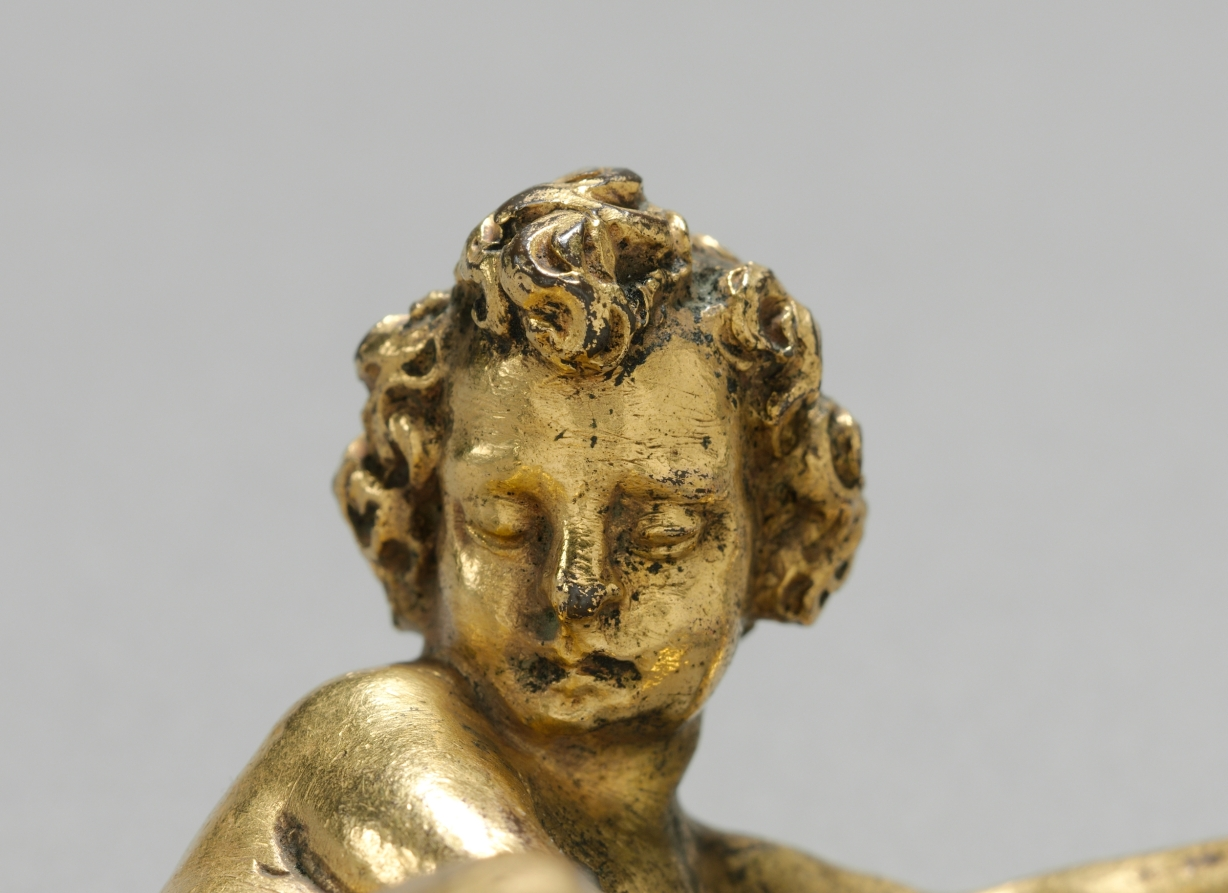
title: Putto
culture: Italy, Rome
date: late 1500s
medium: gilt bronze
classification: Sculpture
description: These gilt bronze putti, or figures of plump male children in the nude, are near mirror images of one another. Both are seated, with their arms flung to the side. Minimal detailing exists in the hands and feet, with the fingers and toes signified only by simple line indentations. The function and original placement of the putti is uncertain, but their posture and the placement of their hands suggest that originally they may have been placed in a larger statue group, perhaps holding either side of a banner, or even a piece of furniture. A will drawn up by Guglielmo della Porta in 1558 mentions the existence of bronze Passion scenes and crucifixes, suggesting that the artist may have created other small bronze groups as well. John Pope-Hennessey attributed these works to della Porta based on their similarity to the figures of Apollo and Artemis in Latona and her Children (Victoria and Albert Museum, London) and the monumental putti in his Tomb of Cardinal Paolo Cesi in Santa Maria Maggiore in Rome, although more recent research points away from della Porta as the maker. Ana Dieglio 2009